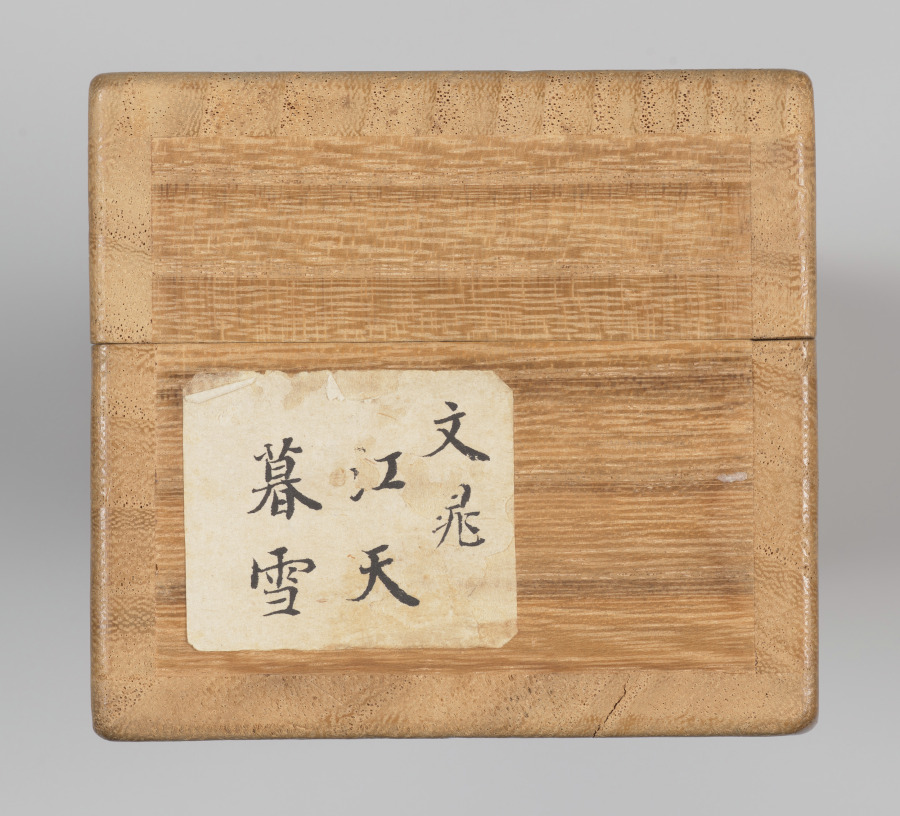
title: Evening Snow Blending River and Sky, from Eight Views of Xiao-Xiang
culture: Japan, Edo period (1615–1868)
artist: Tani Bunchō (Japanese, 1763–1841)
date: 1788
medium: album leaf remounted as a hanging scroll; ink and color on paper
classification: Painting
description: This painting was part of a set of album leaves representing the Eight Views of Xiao-Xiang, a theme originating in Chinese poetry and painting that spread to both Korea and Japan. Southern China’s Xiao-Xiang area, where the mist-covered banks of the Xiang River created a complex landscape shifting like the moods and minds of people, captured the imaginations of generations of painters and calligraphers. Inscriptions on these works suggest that they were possibly ordered by newly prominent Japanese Confucian scholars.